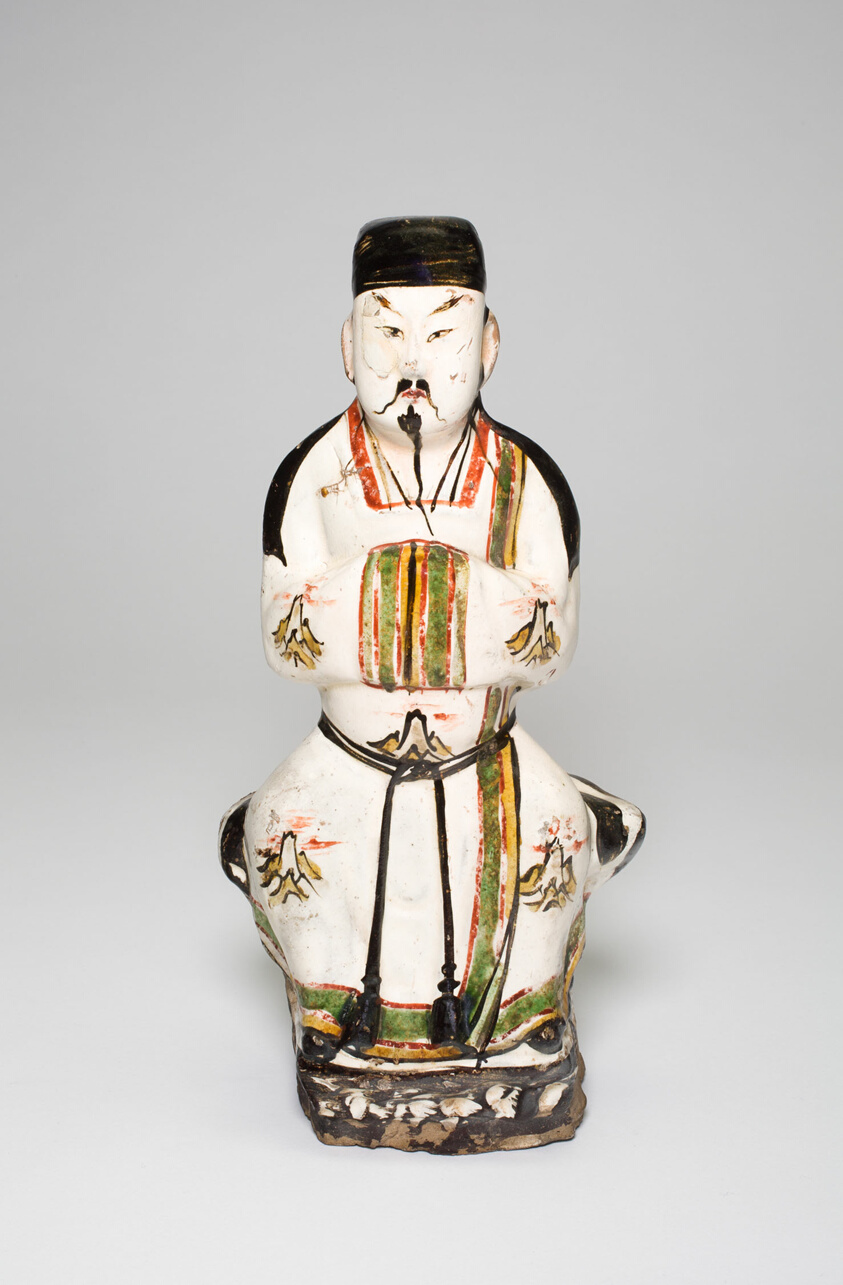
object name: Sculpture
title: Seated Figure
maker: China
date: Song dynasty (960–1279)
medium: Cizhou ware; slip-coated stoneware with iron brown, green, yellow, and red glazes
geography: China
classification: ceramics; asian art